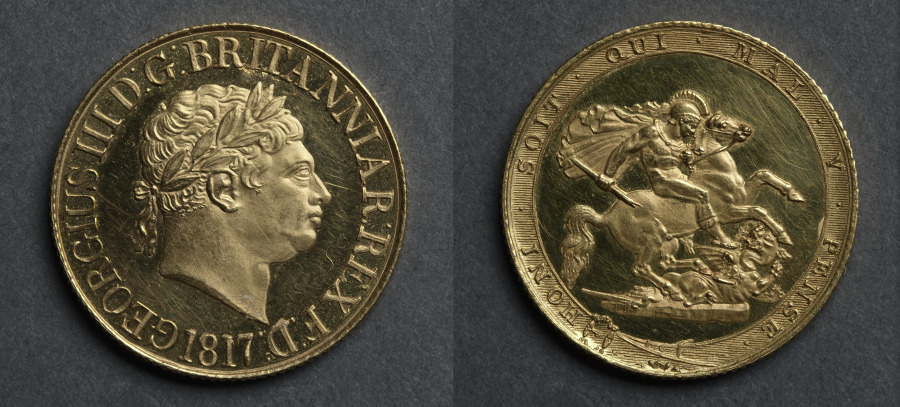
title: Sovereign: George III (obverse); St. George and the Dragon (reverse)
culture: England, George III, 1760-1820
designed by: after Benedetto Pistrucci (Italian, 1784–1855)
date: 1817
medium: gold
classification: Coins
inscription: GEORGIUS III D.G. BRITANNIAR. REX F.D.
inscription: HONI ∙ SOIT ∙ QUI ∙ MAL ∙ Y ∙ PENSE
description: Great changes had occurred since King George III's previous coinage. The Royal Mint had moved out of the Tower of London to new premises in Little Tower Hill. The new mint was fitted with the latest steam-driven machinery by Boulton and Watt, and the whole coinage had been reformed. The guinea of twenty-one shillings was replaced by the sovereign, the pound unit piece, designed by Benedetto Pistrucci, and went into circulation in 1817. The new Royal Mint was placed under the Mastership of William Wellesley Pole, later Lord Maryborough and finally the third Earl of Mornington, an elder brother of the famous Duke of Wellington. Pole was so impressed by a cameo of Saint George and the dragon, cut by Pistrucci, that he invited the artist to England and set him to design the new coinage. For legal reasons Pistrucci could not be appointed chief engraver, which started a quarrel between the artist and the government that lasted nearly 40 years until the Pistrucci's death in 1855. Working with, and often against, various members of the family who held a succession of engraving appointments at the Royal Mint, Pistrucci produced the new coinage of the reign of George III. His magnificent Saint George, seen to its best on this very rare piece, continued to be used from time to time. It is still the reverse type of the British sovereign.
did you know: Benedetto Pistrucci's portrait of the king is a caricature.